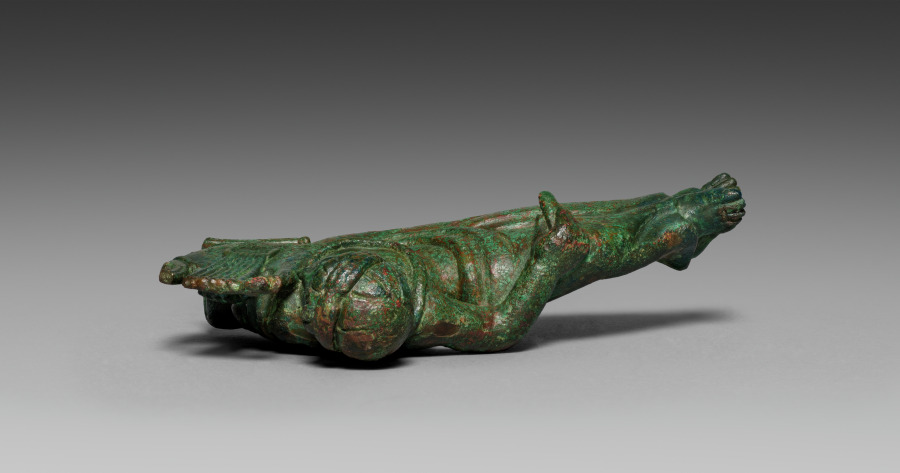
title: Vessel Ornament of Reclining Lyre-player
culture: Etruscan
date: probably 400–375 BCE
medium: bronze with gilding traces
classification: Sculpture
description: This bronze banqueter figurine was one of six once adorning the rim of a large basin, now lost. Cast in molds with individualized details, most have grooves on their underside to attach to the basin. Minute traces of gilding remain on areas of clothing and skin (mostly visible only under magnification), suggesting that they may have been completely gilded. Two handles in the form of hippocampi, horses with serpentine tails, also belonged to the basin and are now displayed at the Michael C. Carlos Museum at Emory University. The basin may have been used to hold liquid for a banquet, or was perhaps funerary. This reclining banqueter holds a lyre in his left hand and an oblong pick in his right hand. His face tilts toward the lyre and garlands hang around his head and chest. Two bare feet emerge from the bottom of the himation in a position distinct from the feet of the other figurines in this group. Some gilding remains on the top edges of the lyre and on the banqueter’s lips and drapery.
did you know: The lyre held by this banqueter bears traces of gilding.